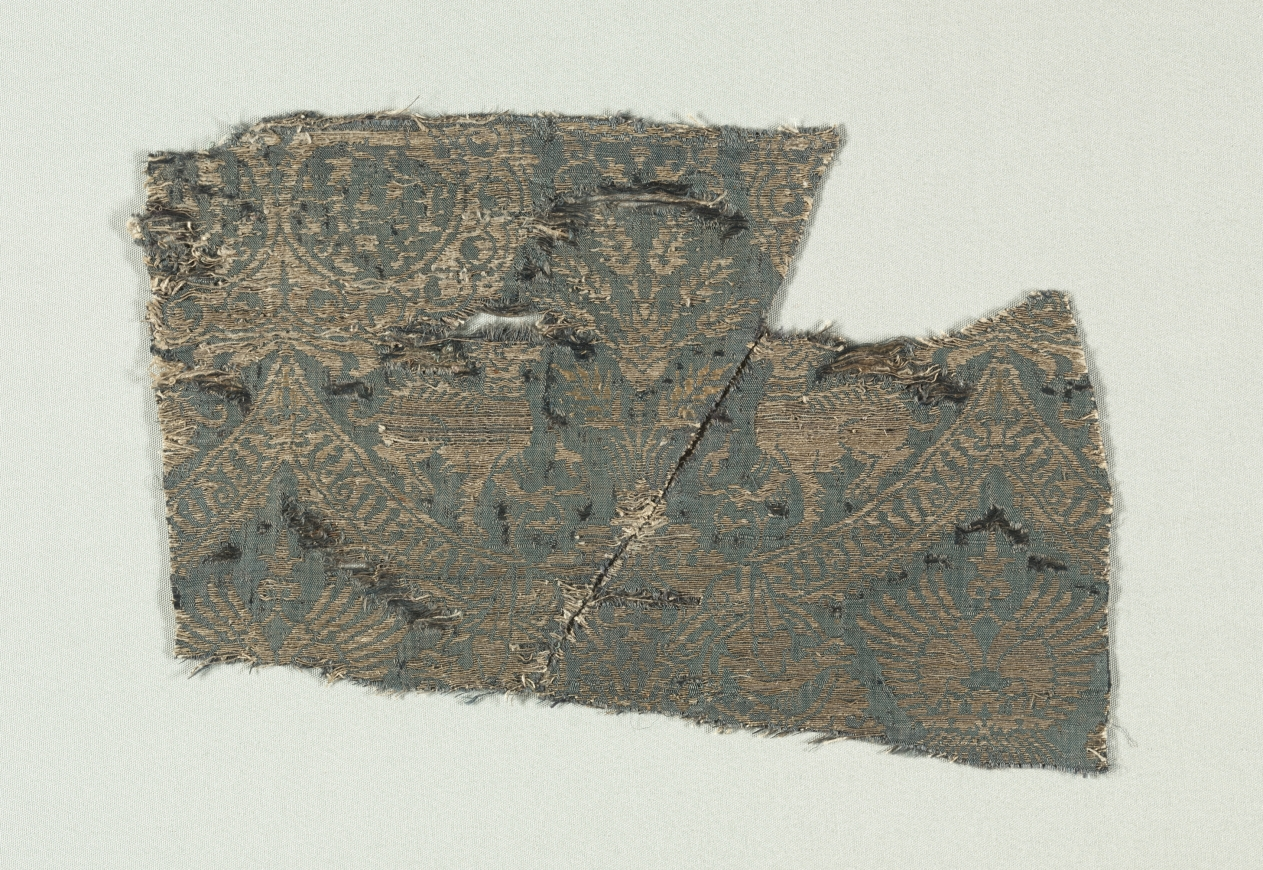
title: Silk with Dogs and Arabic Script in Swaying Bands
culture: Italy, last third of 14th century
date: 1370–1400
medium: silk and silver thread; a combination of two weaves, 2/1 twill and 1/5 twill (lampas)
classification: Textile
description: Arabic script was included in many Italian silk patterns during the 1300s and early 1400s. Usually a few unintelligible but decorative Arabic letters were repeated in the design, but here, the pseudo-Arabic script is prominently displayed in the scalloped bands that support trefoil palmettes. Dogs and birds are incorporated into the pattern in an Italian fashion. During the 1300s and 1400s, Arabic script was featured in luxurious silks woven in Islamic territories, where it symbolized royal power. Spain, Egypt, and to a lesser extent the former Islamic territory of Sicily all produced examples that could have influenced the international silk style created by Italian silk designers. In addition, weavers may also have reinforced the fashion; they migrated from Sicily to the silk-weaving city of Lucca and subsequently to Venice. In Italian painting, pseudo-Arabic script not only decorated the border of the Virgin's mantle, but it was also repeated in silks displayed in the backgrounds.